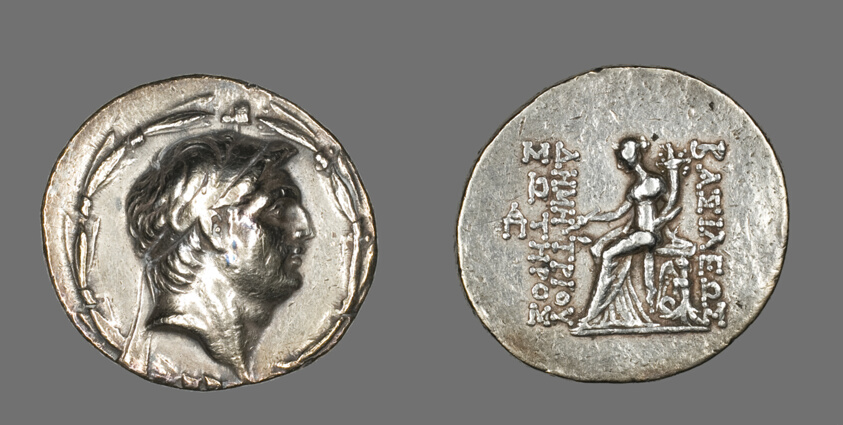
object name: Coin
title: Tetradrachm (Coin) Portraying Demetrios I Soter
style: hellenistic, greek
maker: Greek; minted in Apamea (near modern Hama, Syria)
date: 162-150 BCE, Reign of Demetrios I Soter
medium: Silver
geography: Syria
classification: coin; ancient art